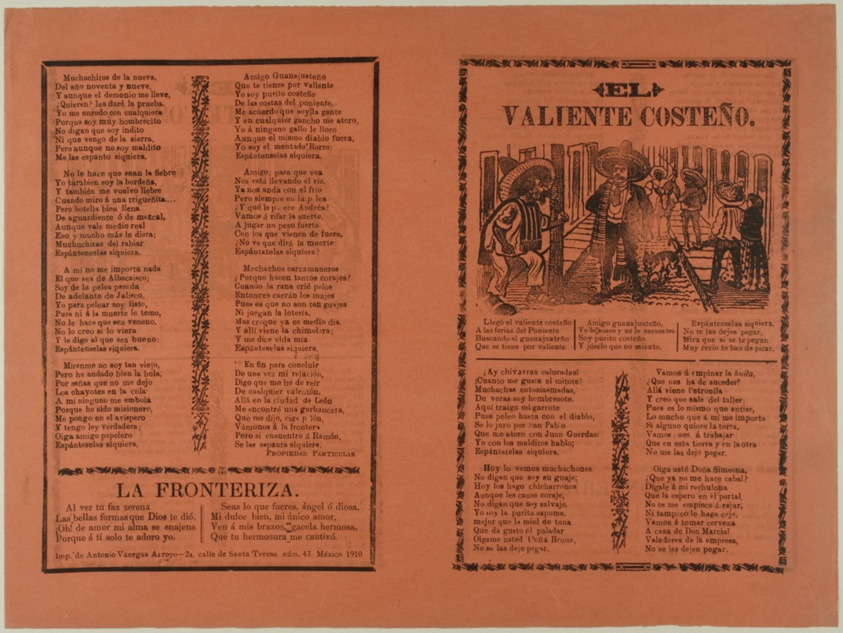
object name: Print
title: El valiente costeño (The Brave Man from the Coast)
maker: José Guadalupe Posada (Mexican, 1852-1913)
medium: Relief print on paper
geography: Mexico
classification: relief etching; print; prints and drawing